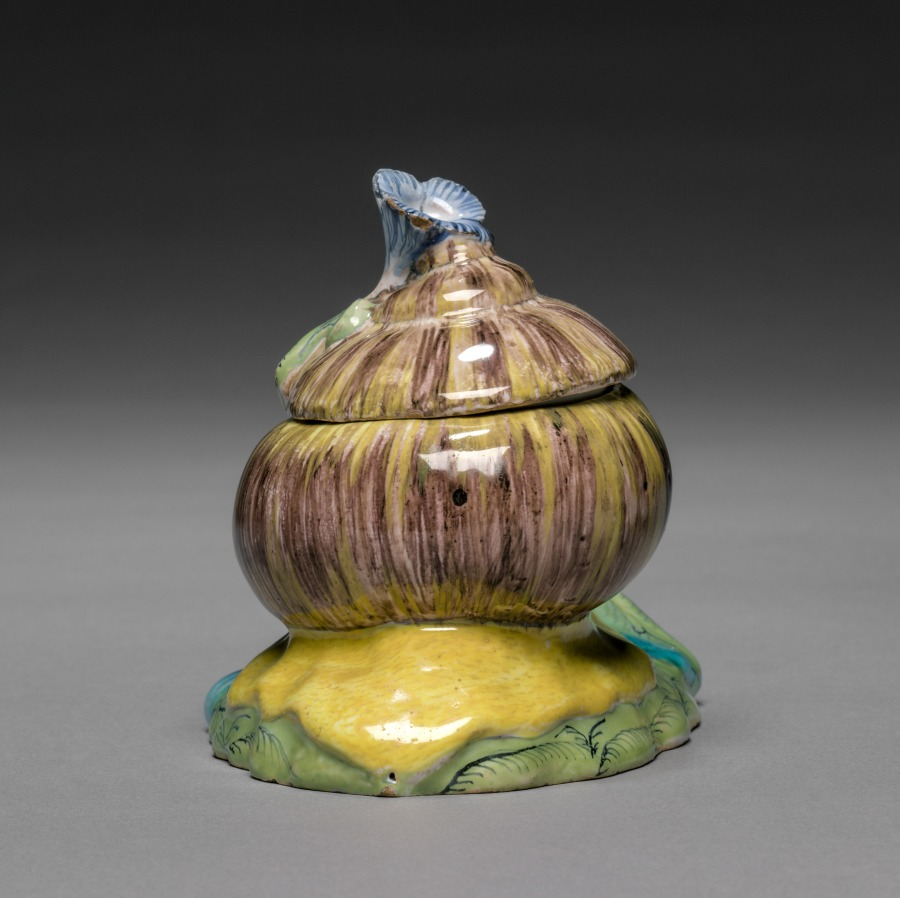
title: Covered Box in the Form of a Snail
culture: France, 18th century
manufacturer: Strasbourg Factory (France)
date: c. 1750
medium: faience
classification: Ceramic